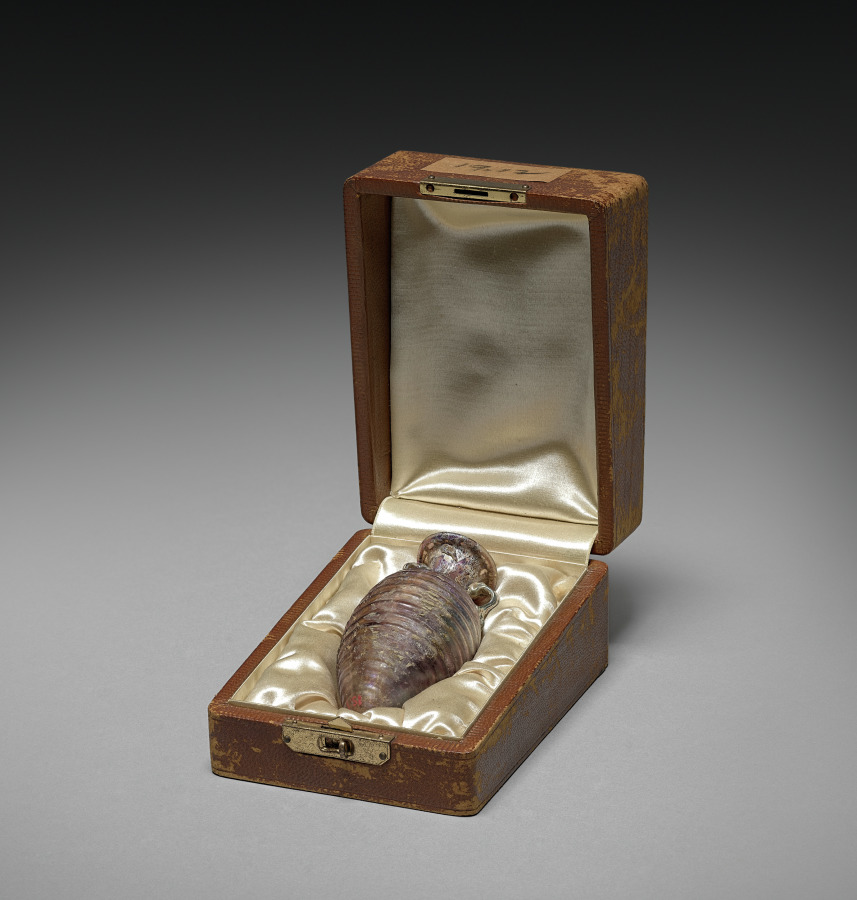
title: Amphoriskos (Small Amphora)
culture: Roman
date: 50–100 CE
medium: glass, mold-blown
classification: Glass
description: First blown in a mold, then supplied with separately made handles, this small vessel likely held perfumed oil, a valuable commodity. Originally violet in color, its surface is now partially marred by areas of buff and iridescent weathering. The finely ribbed body is quite elegant, however, and its extravagant modern box attests to its significant value for a modern owner (prior to 1919).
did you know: Although much smaller, glass amphoriskoi (“small amphorae”) are similar in form to ceramic transport amphorae.